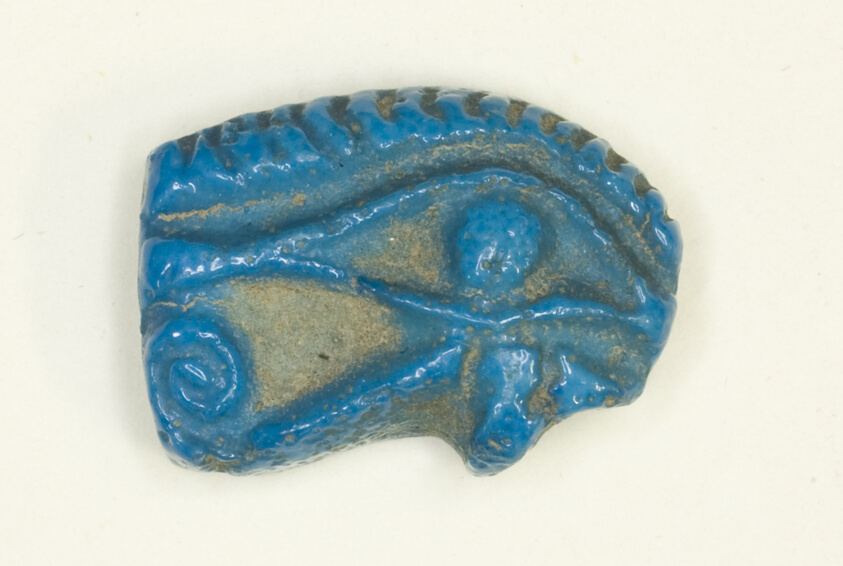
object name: Costume and Accessories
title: Eye of Horus (Wedjat) Amulet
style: new kingdom, eighteenth dynasty, egyptian, ancient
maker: Egyptian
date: New Kingdom, Dynasty 18 (1550 BCE–1295 BCE)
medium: Faience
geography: Egypt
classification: amulet; jewelry; ceramics; ancient art; costume; faïence (composite material)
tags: eye of Horus